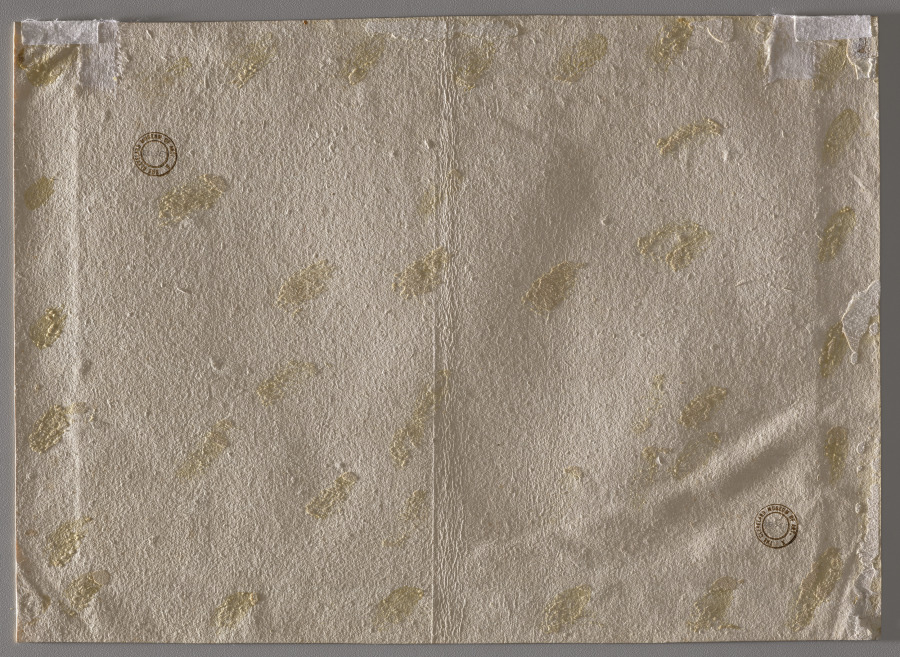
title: Saint Jerome in a Landscape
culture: Italy, 16th century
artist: Domenico Campagnola (Italian, 1500–1564)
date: c. 1530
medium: pen and brown ink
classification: Drawing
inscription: RECTO OF MOUNT, lower left, in graphite: 61 [6 crossed out, 1 underlined] / 236 [underlined] ; lower center, in graphite: Titian [inscribed in a cartouche] ; lower center, in graphite: 3 ; lower right, in graphite: 8930 [erased] ; lower right, in graphite: [illegible]/q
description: Domenico Campagnola helped to establish a specialized collector’s market for landscape drawings, building upon the legacy of his father, Giulio Campagnola, and Titian. Like Titian, Domenico’s works emphasize God’s power as expressed through the natural world. Hermit Saint Jerome, at lower left, sits in spiritual contemplation within a dynamic landscape rendered with Domenico’s distinctive linear style, complete with rustic houses, humble tree groves, and grand distant vistas. Independent drawings (drawings made as works of art in and of themselves) were a new category of drawing advanced by Domenico and others.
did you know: Domenico Campagnola was one of the first artists in Renaissance Italy to create drawings such as this as ends in themselves rather than as preparatory studies.